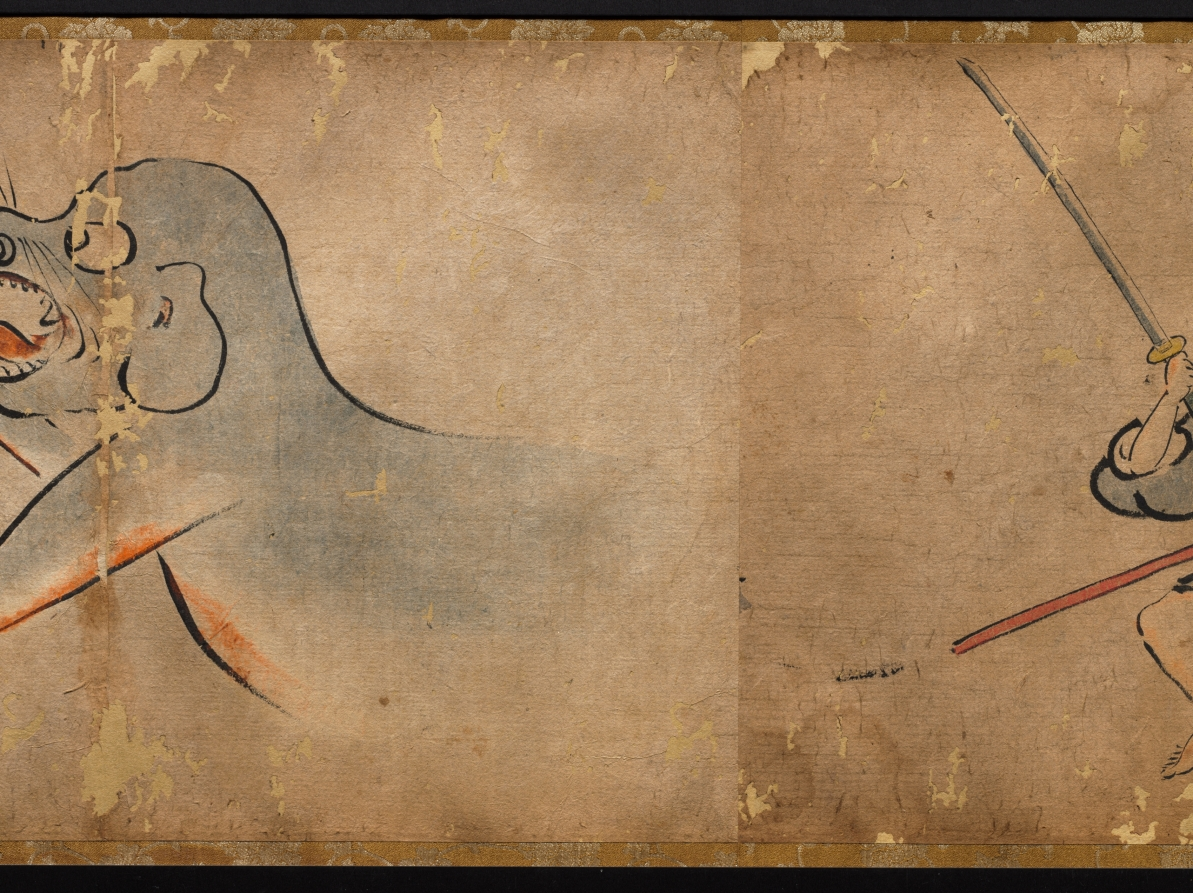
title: The Illustrated Tale of Oishi Hyōroku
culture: Japan, Edo period (1615–1868)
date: 1700s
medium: handscroll; ink and color on paper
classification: Painting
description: This incomplete handscroll illustrates part of the story of Oishi Hyoroku, a young man tasked with battling fox apparitions who were creating problems in his town. In other extant versions of the scroll, the story is set in the fall of 1624 in Kagoshima in southern Japan. Throughout the story, Hyoroku is tricked and terrified by the foxes that shift their shapes into a variety of monstrous phantoms. After repeated humiliations, he eventually captures two of the foxes. In this version, colloquial texts that function like text blurbs in comics appear throughout the scroll, but the main text is missing.